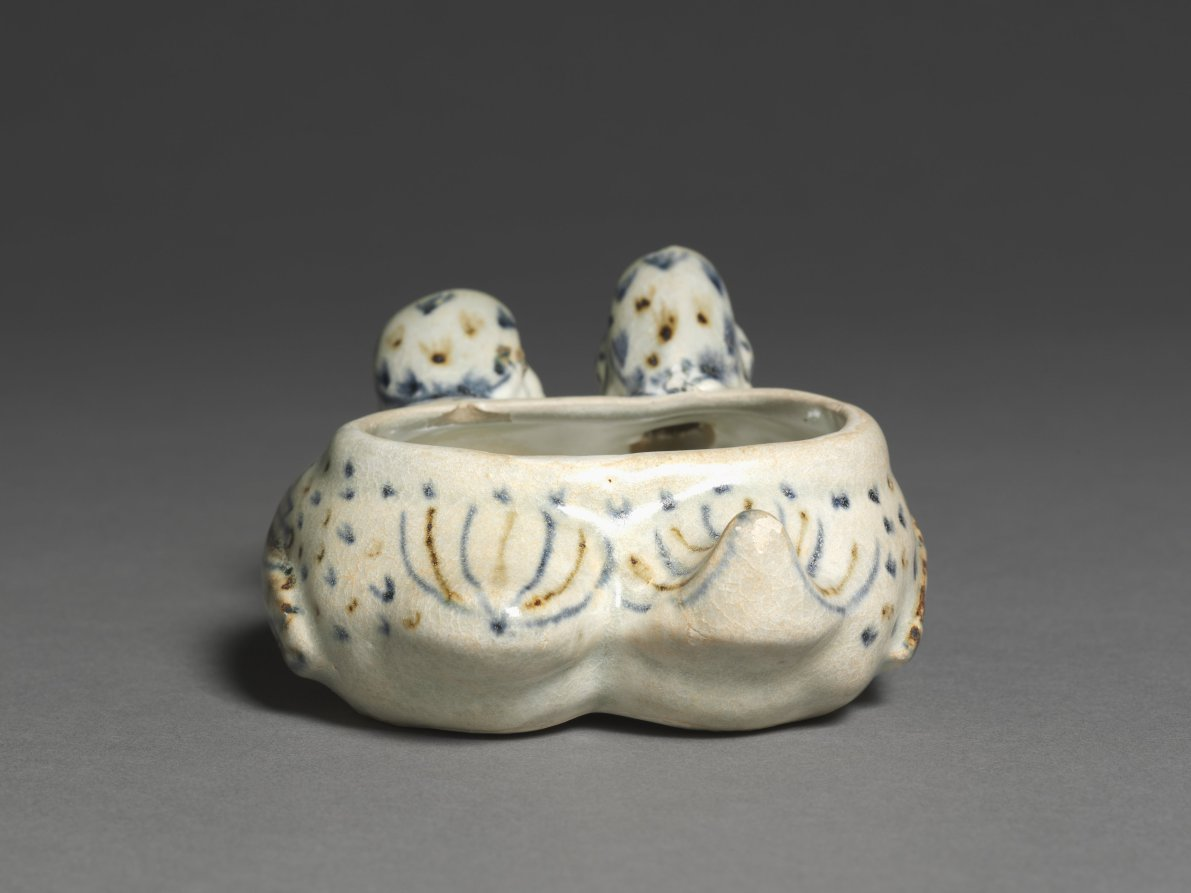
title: Double Ducks Jar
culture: Vietnam (Annam)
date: 1400s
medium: porcelain with underglaze blue and iron spots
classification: Ceramic